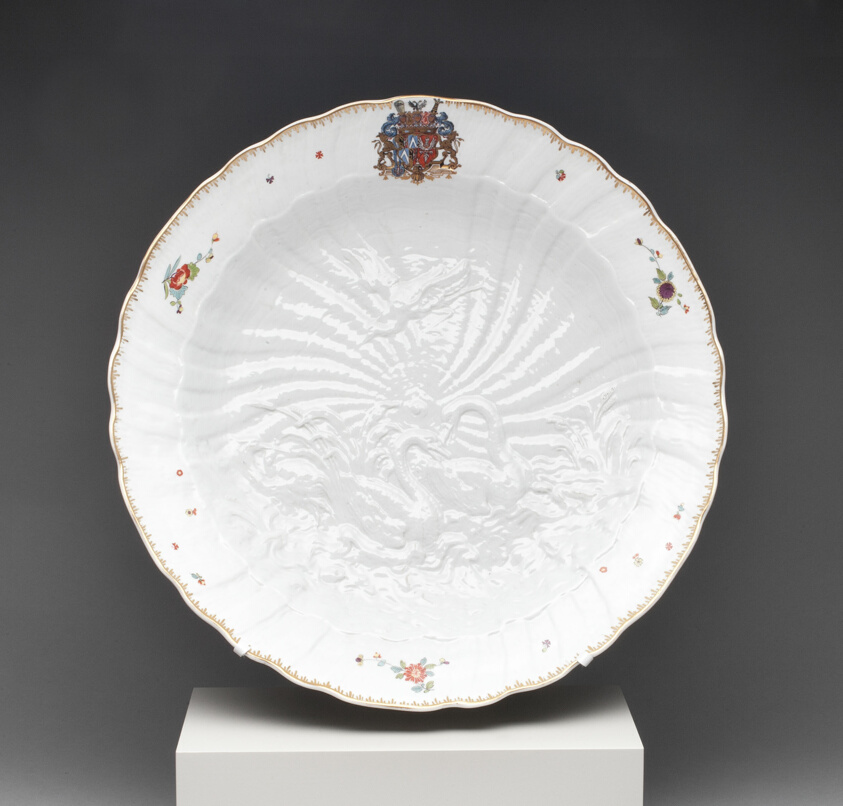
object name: Ceramics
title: Dish from the Swan Service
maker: Meissen Porcelain Manufactory; German, founded 1710; Modeled by Johann J. Kändler (German, 1706-1775) and J. F. Eberlein (German, active 1735-49)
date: 1738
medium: Hard-paste porcelain, polychrome enamels, and gilding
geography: Meissen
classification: dish (vessel); tableware; ceramics; porcelain; european decorative arts